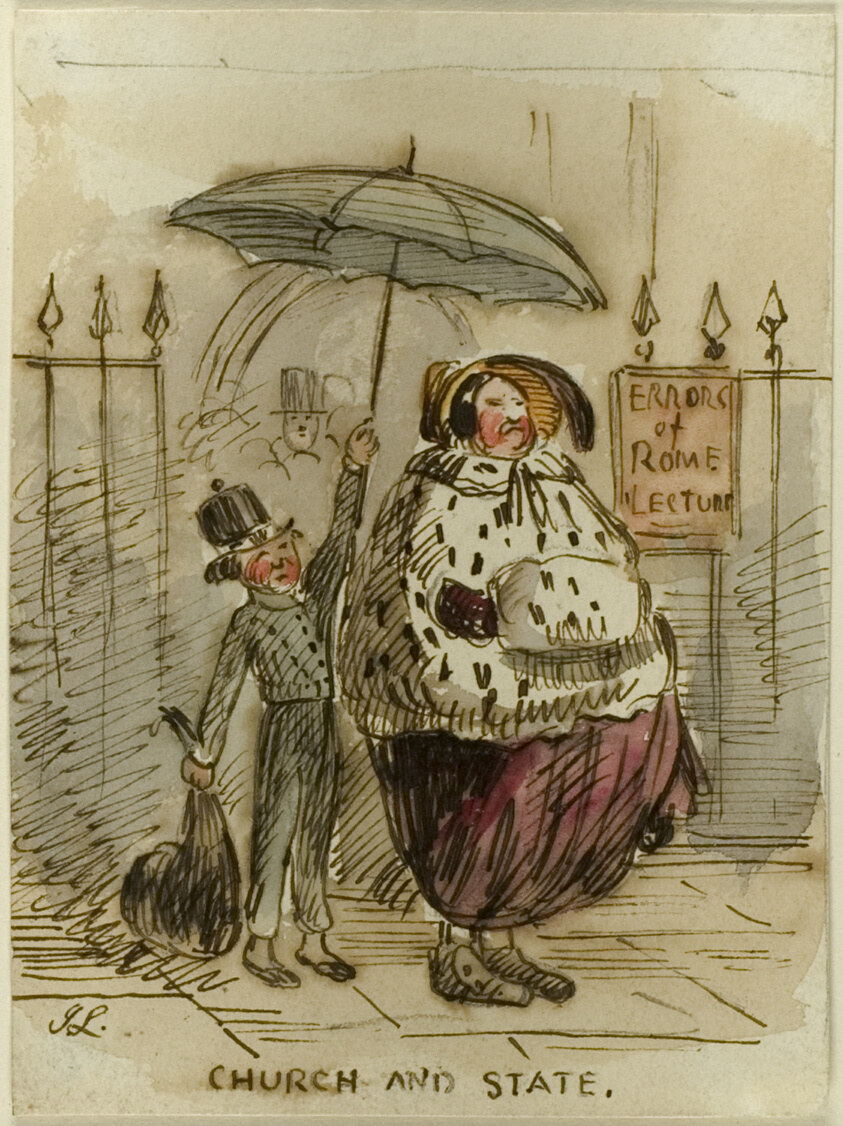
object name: Drawing and Watercolor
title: Church and State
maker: John Leech (English, 1817-1864)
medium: Watercolor and pen and brown ink, over graphite, on cream wove paper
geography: England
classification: watercolor; drawings (visual works); prints and drawing